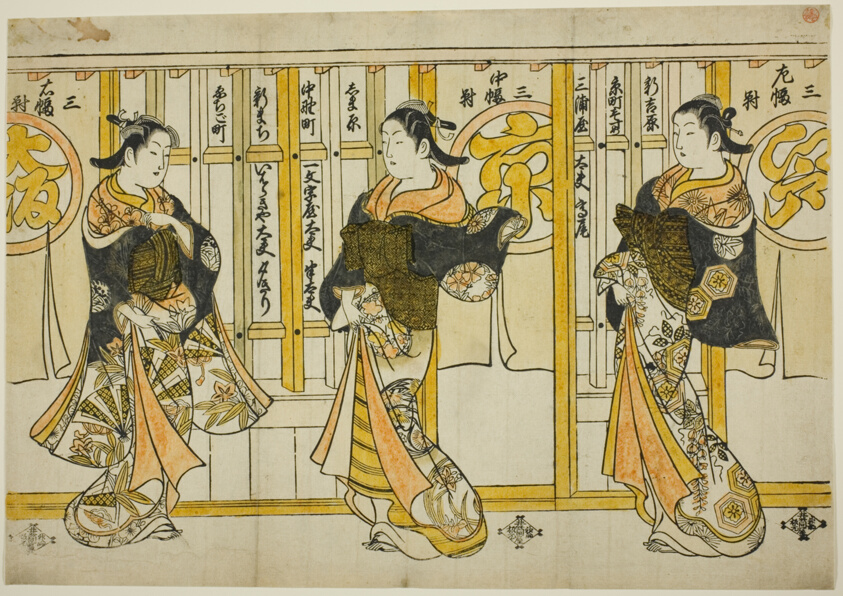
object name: Print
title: Beauties of the Three Capitals: Edo (right), Kyoto (center), and Osaka (left)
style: Japanese (culture or style)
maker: Attibuted to Torii Kiyomasu II; Japanese, 1706 (?)–1763 (?)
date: c. 1729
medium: Hand-colored woodblock print; uncut hosoban triptych, urushi-e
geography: Japan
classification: woodblock print; print; asian art